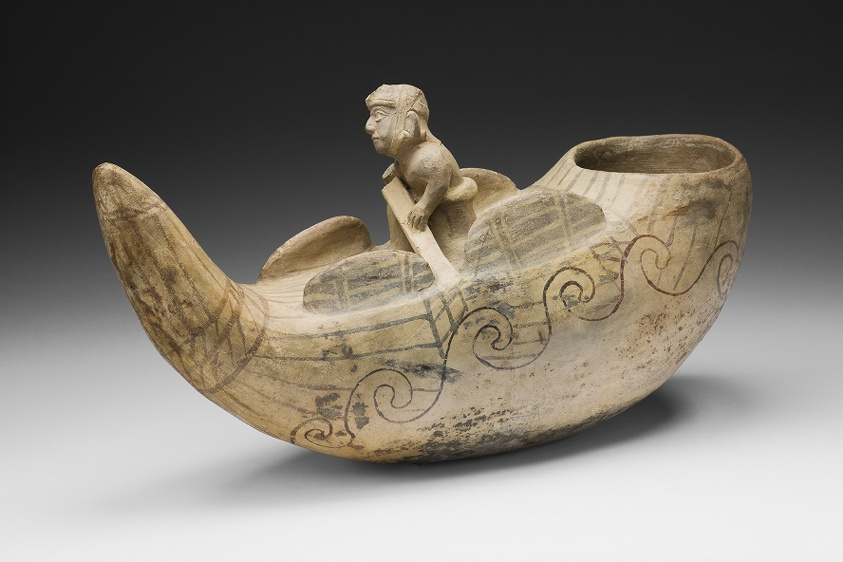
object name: Vessel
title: Vessel in the Form of a Fisherman in a Reed Boat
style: moche, mochica v, mochica, early intermediate period, Pre-Columbian, americas, andes, Arts of the Americas, andean, south american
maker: Artist unknown (Moche); North coast, Peru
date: 100 BCE–500 CE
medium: Ceramic and pigment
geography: Peruvian North Coast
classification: earthenware; ceramics; vessel; art of the americas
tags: people